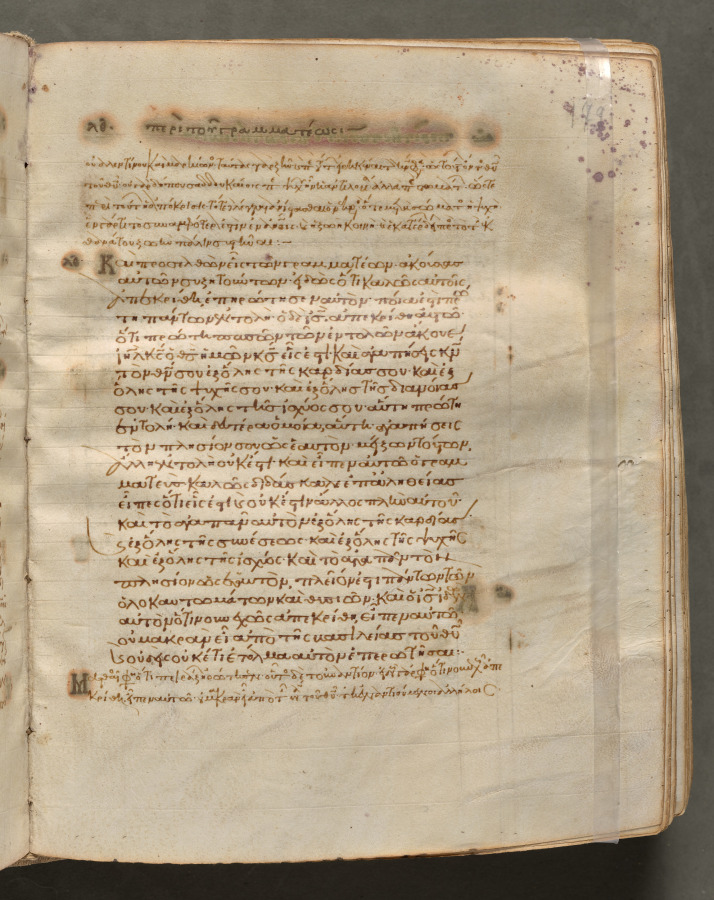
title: Text, folio 179 (recto), from a Gospel Book with Commentaries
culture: Byzantium, Constantinople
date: c. 1000–1100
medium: ink, tempera, and gold on vellum; leather binding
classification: Bound Volume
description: Each of the four gospels in this book opens on a page with brilliantly illuminated borders depicting the author of the text as well as birds-principally peacocks, symbols of the immortality of the soul-and fountains, representing the fountain of life and the salvation of the soul. This volume consists of 428 leaves with texts in Greek. Its level of sophistication suggests that it was probably written and decorated in a monastery in Constantinople.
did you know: Gospel Books were carried in procession through Byzantine churches.